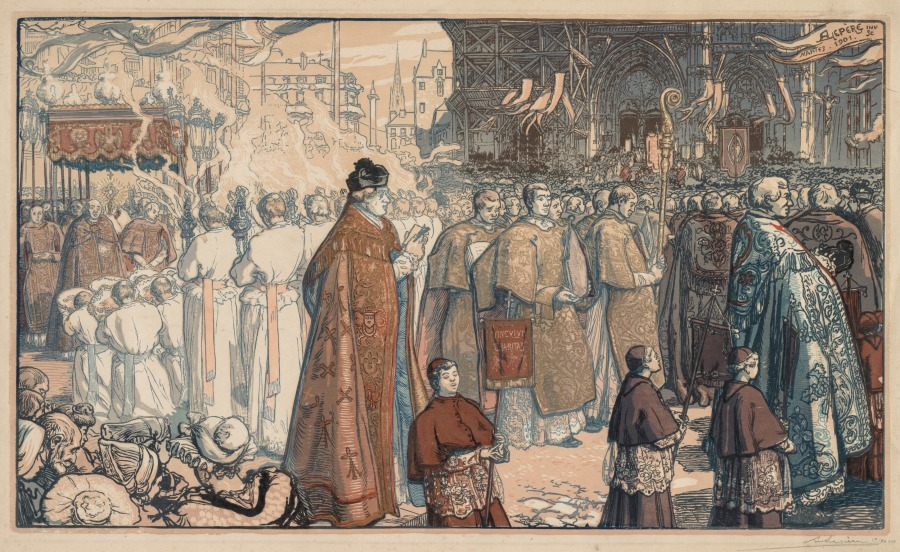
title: La Procession de la Fête-Dieu à Nantes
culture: France, 19th-early 20th Century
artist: Auguste Louis Lepère (French, 1849–1918)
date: 1901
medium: chiaroscuro woodcut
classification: Print